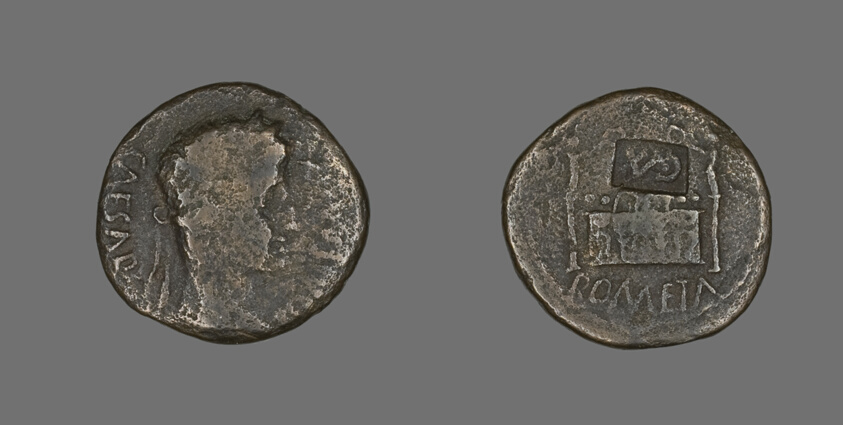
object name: Coin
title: Coin Portraying Emperor Augustus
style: imperial (roman), ancient, roman (ancient, style or period)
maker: Roman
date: 27 BCE-14 CE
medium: Bronze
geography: Roman Empire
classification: coin; struck; ancient art